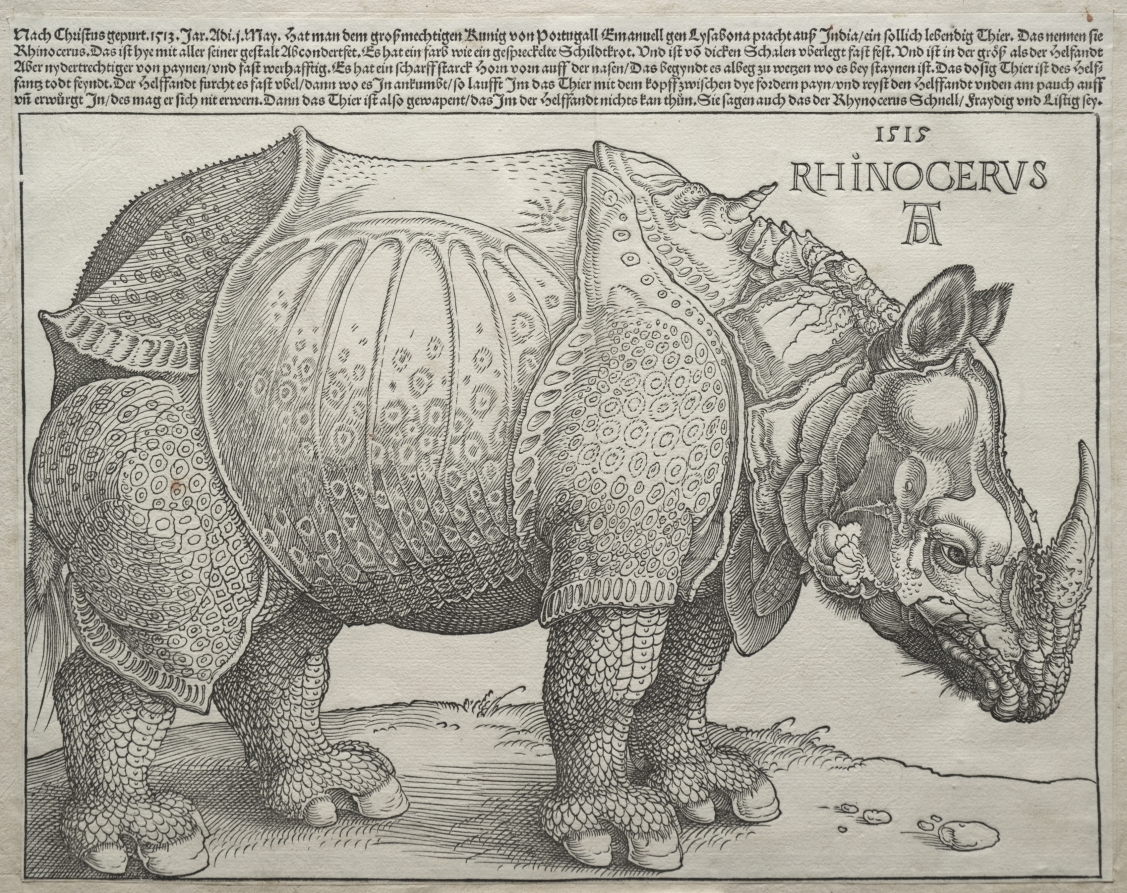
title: The Rhinoceros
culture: Germany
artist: Albrecht Dürer (German, 1471–1528)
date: 1515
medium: woodcut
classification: Print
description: In May 1515, the first rhinoceros since antiquity to reach Europe alive arrived in Lisbon, Portugal. The ruler of Gujarat, Sultan Muzafar II, presented the exotic beast to the governor of Portuguese India, Alfonso d’Albuquerque, who then sent it to King Manuel I. Later that year, the king sent the animal as a political gift to Pope Leo X. Sadly, the ship sank on its way to Italy, and the rhinoceros drowned. Dürer and his contemporaries were fascinated with discoveries of the natural world, and as the rhinoceros made its journey, reports of the animal spread across Europe. Although he never saw the rhinoceros himself, Dürer based his woodcut of the animal on a description and a sketch that was sent to Nuremberg. The Latin text at the top of the print describes the rhinoceros to be the color of a speckled tortoise, covered in thick plates, and so well armed that even an elephant could not fend it off.